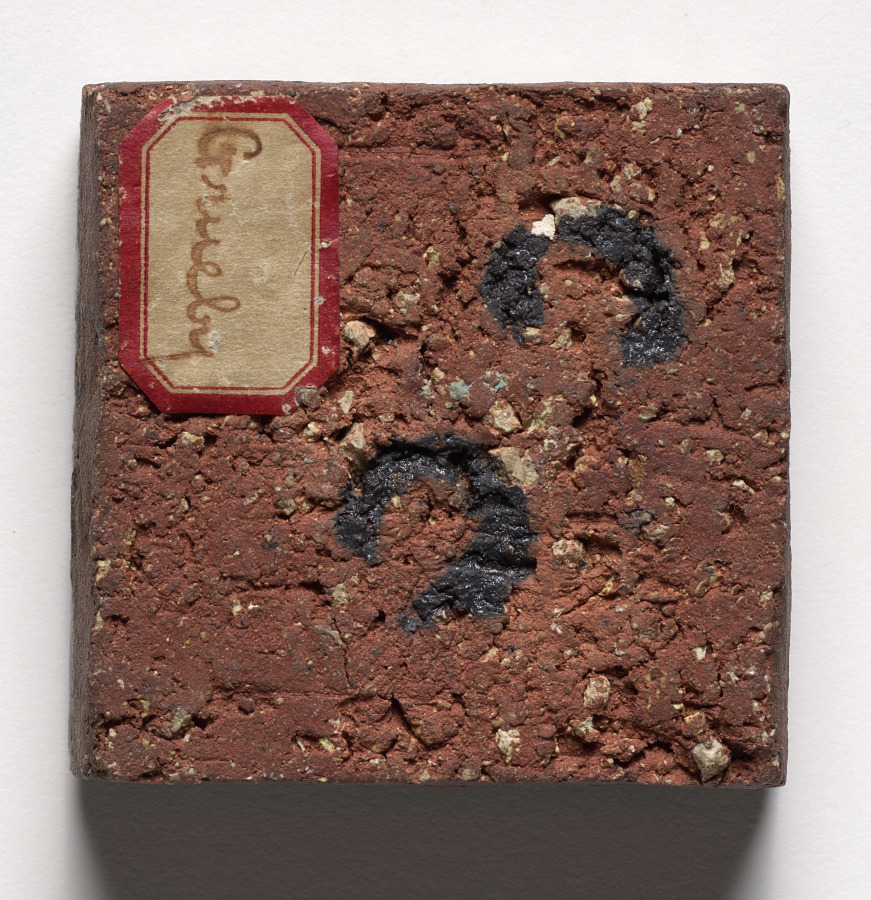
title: Tile- Flower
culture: America, Massachusetts, Boston, Early 20th century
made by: Grueby Pottery Company (American)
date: before 1920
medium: glazed ceramic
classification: Ceramic